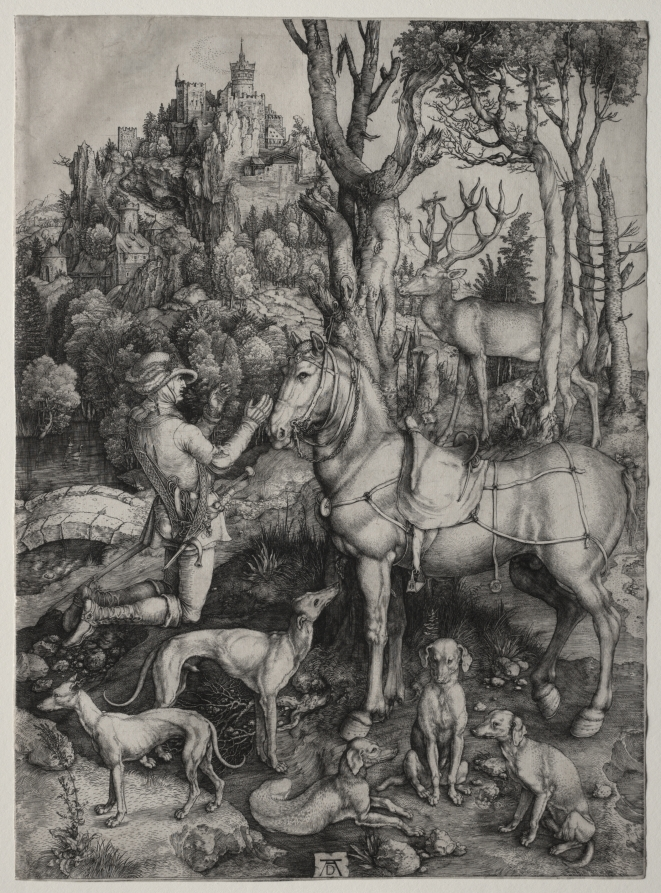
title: Saint Eustace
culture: Germany, late 15th-early 16th Century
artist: Albrecht Dürer (German, 1471–1528)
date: c. 1501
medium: engraving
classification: Print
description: Here, an encounter with nature dramatically alters a man’s journey through life. After Roman general Placidas tracked a stag in the forest, he saw a miraculous apparition of a crucifix between its horns. The miracle resulted in the general’s (thereafter Saint Eustace) immediate conversion to Christianity. Albrecht Dürer’s largest engraving demonstrates his mastery of tonal values and textures. His intense interest in nature’s variety makes finding the crucifix a kind of treasure hunt. Dürer took particular interest in the hunting dogs by carefully posing them to show five different aspects of the canine figure.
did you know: The artist showed an interest in how bodies move in space by depicting a hunting dog five times from different angles.